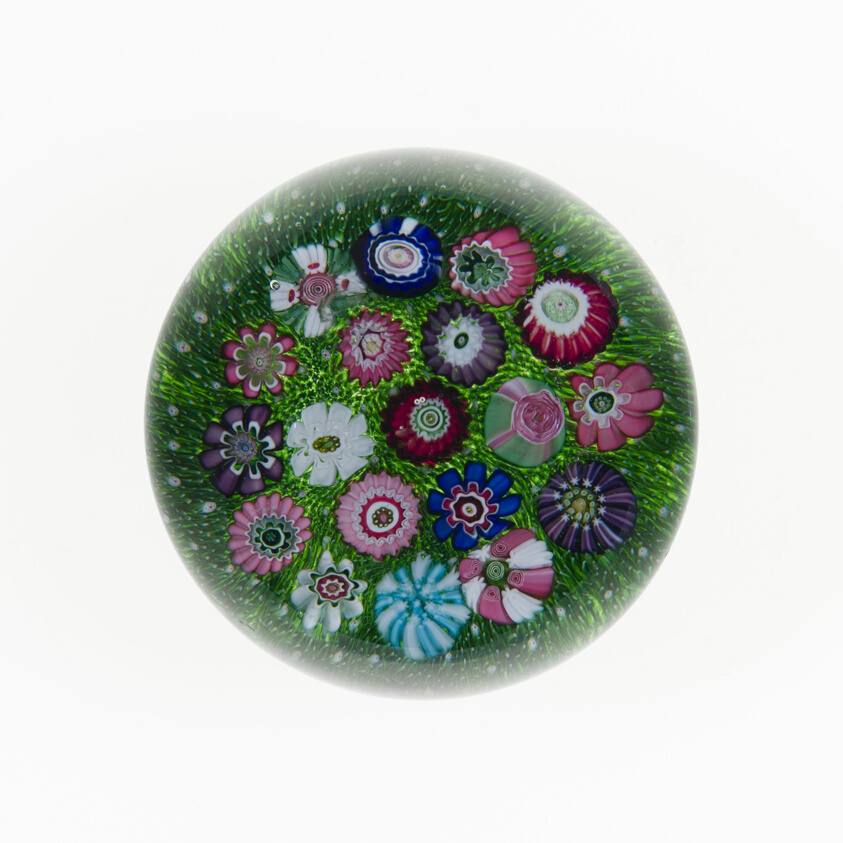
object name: Glass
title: Paperweight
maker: Clichy Glassworks (Cristalleries de Clichy); Clichy, France, 1837-1885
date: 19th century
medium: Glass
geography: Clichy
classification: paperweight; millefiori; european decorative arts; glass